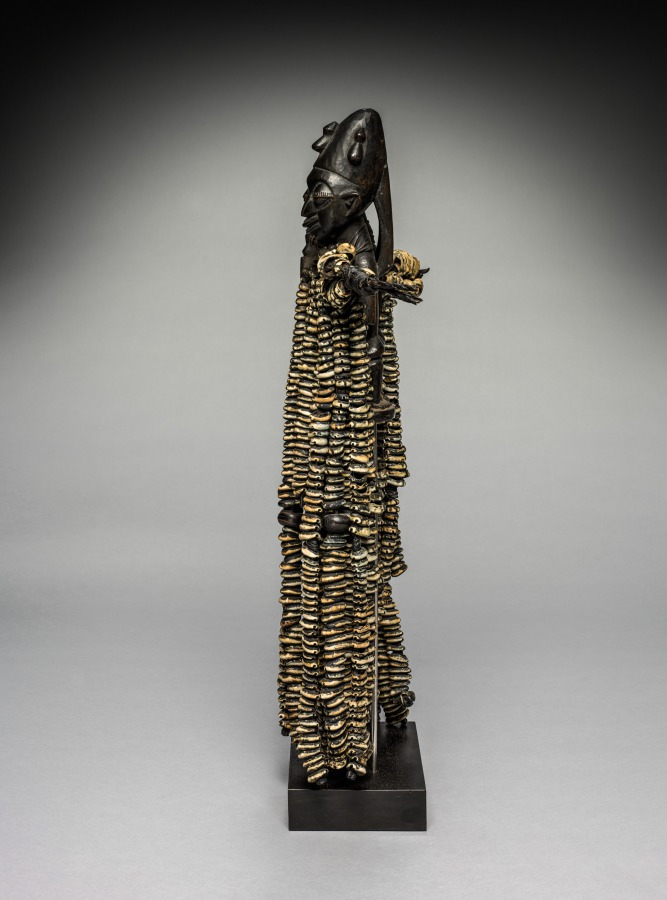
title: Dance staff for Èṣù (Ògò Èlẹ́gba)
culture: Africa, West Africa, Nigeria, Yorùbá-style maker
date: 1800s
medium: Wood, leather, cowrie shells, seeds, and natural fiber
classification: Sculpture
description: Èṣù (also called Èḷégba) embodies the most complex deity in the Yorùbá pantheon of gods. The messenger of the Yorùbá gods, Èṣù is also the bearer of sacrifices, guardian of the ritual way of life, and is associated with highly significant places including crossroads, markets, and home entrances. As seen here, Èṣù's power is often visually represented in Ògò Èḷégba (dance staffs); in this example, the unusually paired man and woman reference his ability to switch between the two genders, turn death into life (through childbirth), and to overcome the tension between the sexes. The male character bears a ritual flute reserved for this god. The abundance of cowrie shells means that Èṣù brings wealth.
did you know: If Eshu isn’t properly honored, trouble may befall the community or individual.